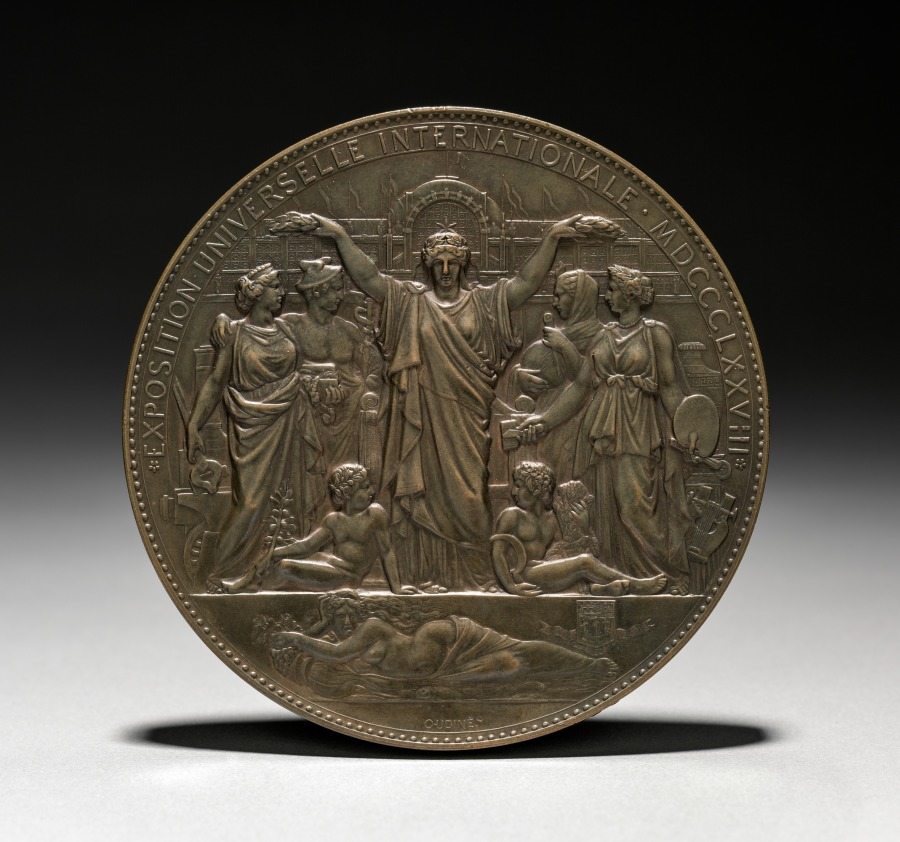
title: Medal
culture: France, 19th century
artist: Eugène André Oudiné (French, 1810–1887)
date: 1878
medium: bronze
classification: Metalwork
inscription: "EXPOSITION UNIVERSELLE INTERNATIONAL . MDCCCLXXVIII"; below: "OUDINÉ."